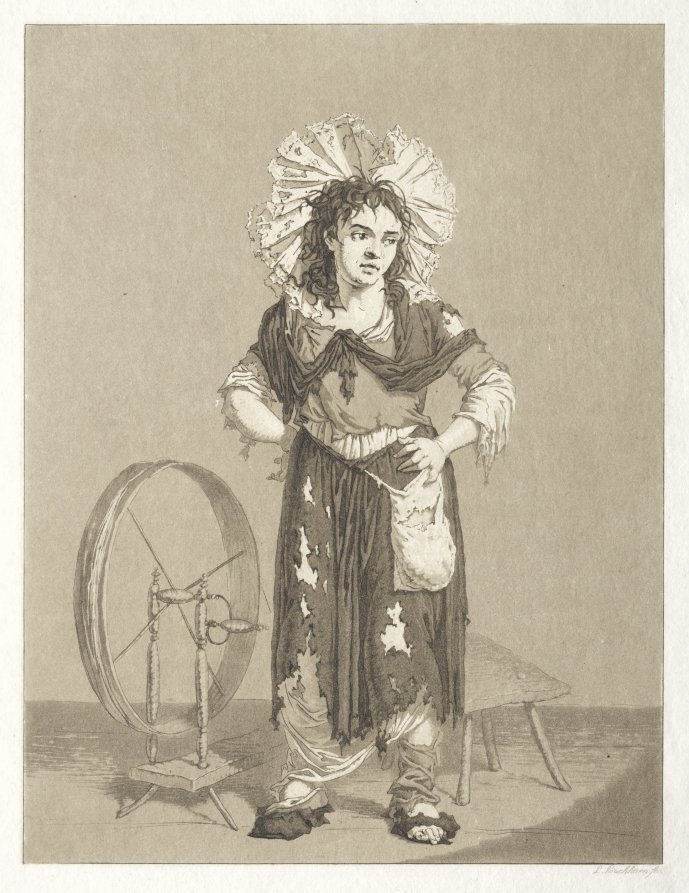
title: The Young Beggars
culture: Germany, late 18th-early 19th century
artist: Karl Ludwig Bernhard Buchhorn (German, 1770–1856)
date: c.1800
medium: aquatint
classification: Print